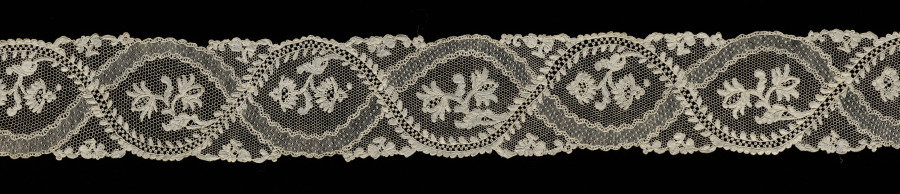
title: Lace Lappet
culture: France, Argentan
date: 1715–74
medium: Linen: needle lace (Point de Argentan)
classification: Lace